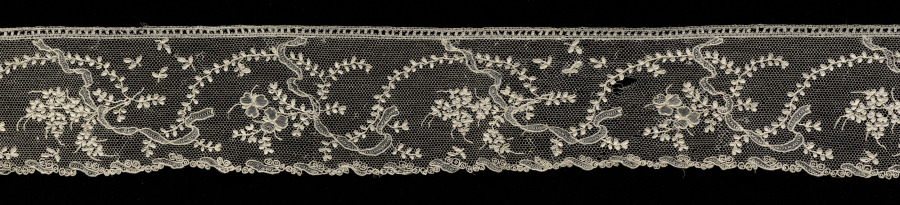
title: Lace Edging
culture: France, Alençon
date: 1740–60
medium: Needle lace (Point d'Alençon)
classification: Lace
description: With its flowing ribbon and garland pattern, this lace edging is from the late Louis 15th period or early Louis 16th period.